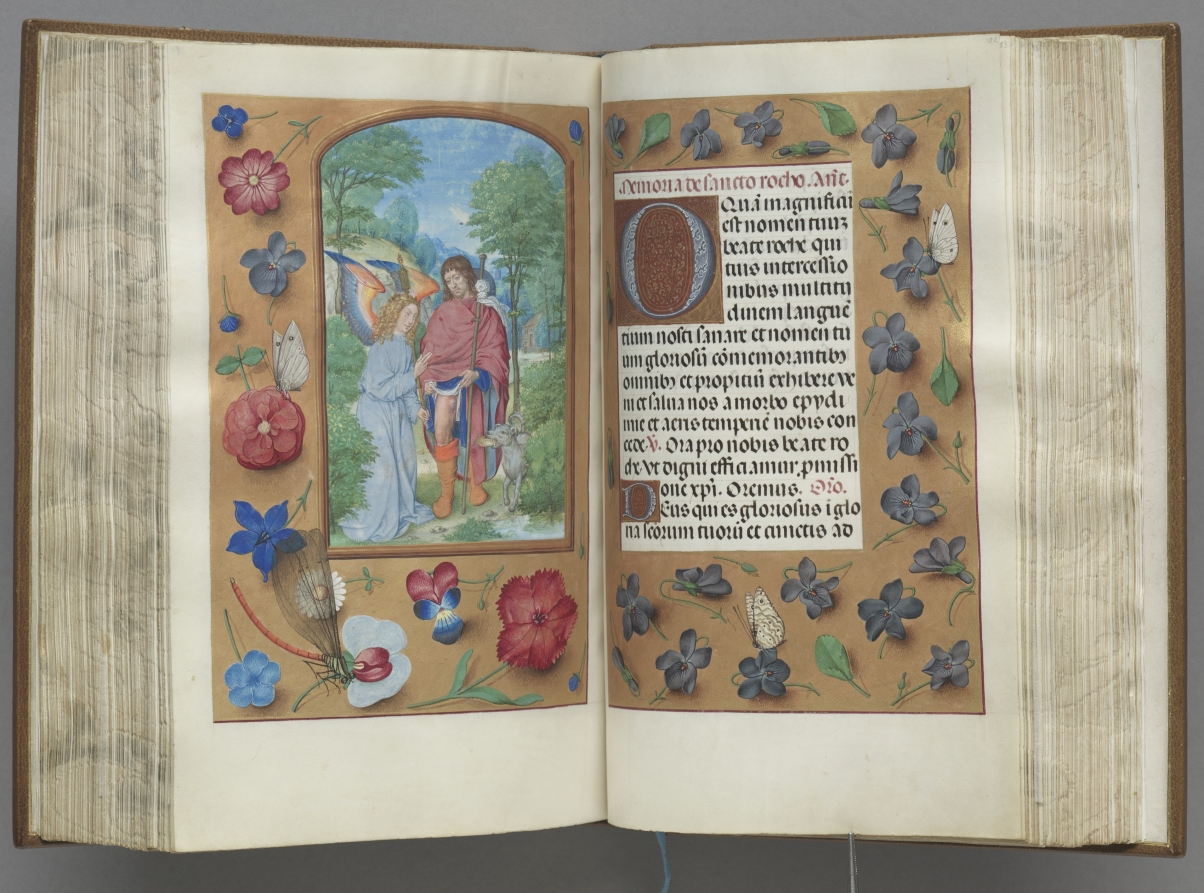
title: Hours of Queen Isabella the Catholic, Queen of Spain: Fol. 182r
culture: Flanders, Ghent and Bruges, late 15th century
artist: Master of the First Prayerbook of Maximillian (Flemish, c. 1444–1519)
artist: and Associates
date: c. 1500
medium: ink, tempera, and gold on vellum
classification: Bound Volume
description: This manuscript was illuminated by a circle of at least five highly organized manuscript painters active in the Flemish cities of Ghent and Bruges. The principal illuminator was Alexander Bening, who painted the majority of the book's miniatures. Manuscripts produced by this circle of artists are renowned for the decoration of their borders, which typically feature a rich variety of realistically-painted flowers, birds, and butterflies. This prayer book, called a book of hours, was intended not for a cleric, but for the private devotions of a lay person-in this case, Isabella the Catholic, Queen of Spain (1451-1504). Isabella's coat of arms embellishes the book's frontispiece. It is unlikely that the book was commissioned by the Queen herself; rather, she probably received it as a diplomatic gift from someone courting her patronage, perhaps Cardinal Francisco Jimenez de Cisneros. A Franciscan friar, Jimenez was dependent upon Isabella for his advancement, first to the post of Queen's confessor in 1492, and then to Archbishop of Toledo in 1495.